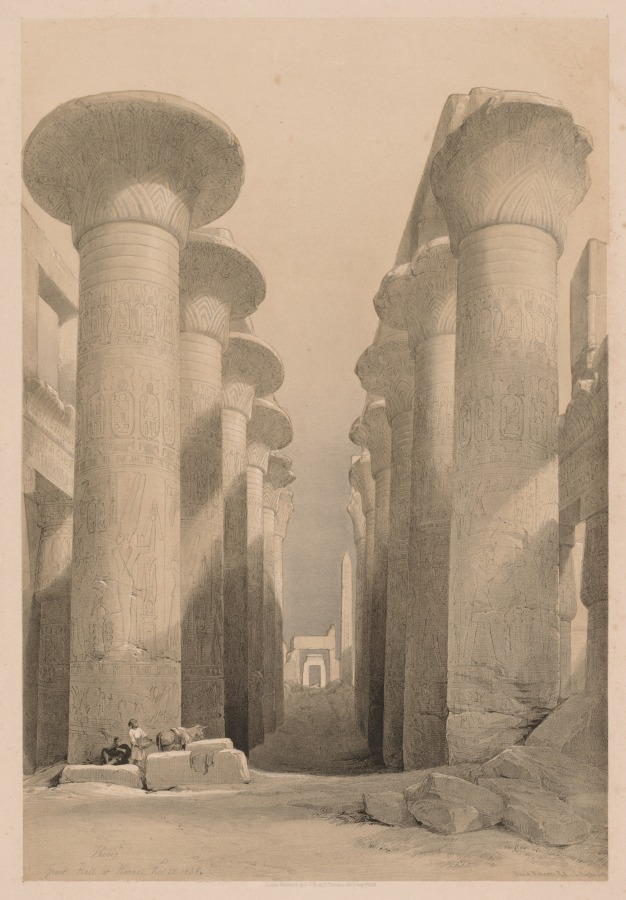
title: Egypt and Nubia: Volume I - No. 20, Great Hall at Karnak, Thebes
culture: England, 19th century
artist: Louis Haghe (British, 1806–1885)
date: 1838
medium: color lithograph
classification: Print